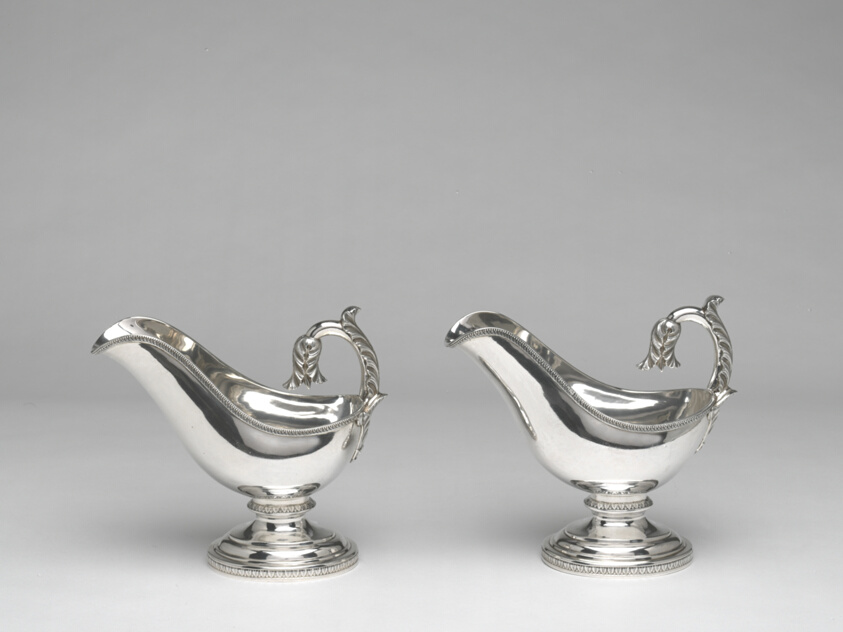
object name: Metalwork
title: Pair of Sauceboats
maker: Thomas Fletcher (American, 1787–1866); Philadelphia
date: c. 1830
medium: Silver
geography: Philadelphia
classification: dish (vessel); vessel for serving food; sauceboat; decorative arts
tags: dining, drinking